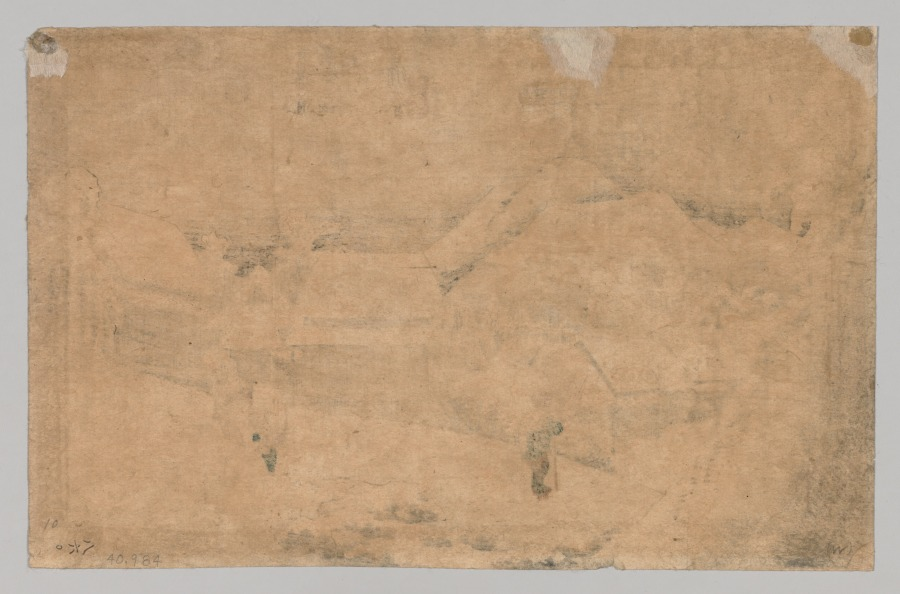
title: Kambara: Evening Snow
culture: Japan, Edo period (1615–1868)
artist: after Utagawa Hiroshige (Japanese, 1797–1858)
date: 1797–1858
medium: color woodblock print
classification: Print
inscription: Signature: Hiroshige Gwa (two character signature of middle period) Publisher Seal: Take-Uchi